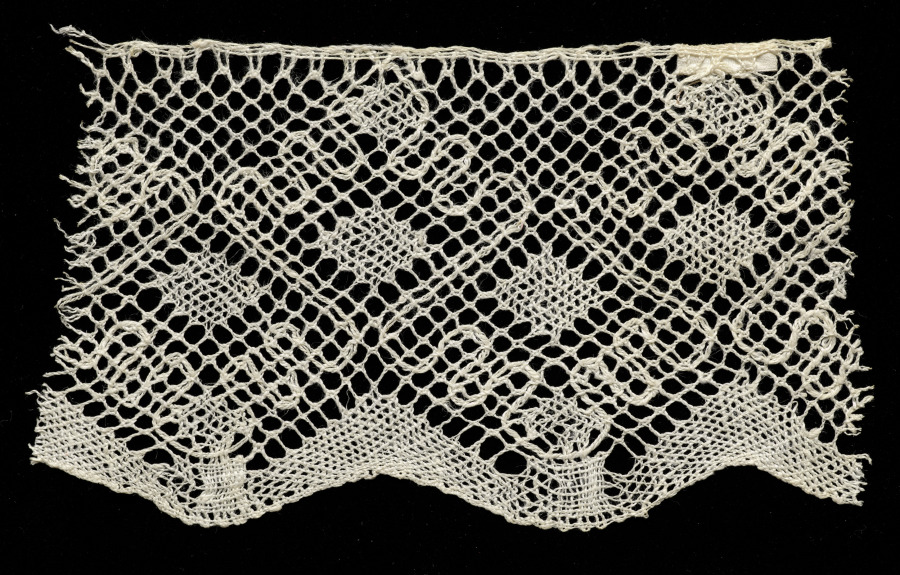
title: Lace Edging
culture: Spain, Huelva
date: 1700s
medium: Bobbin lace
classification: Lace